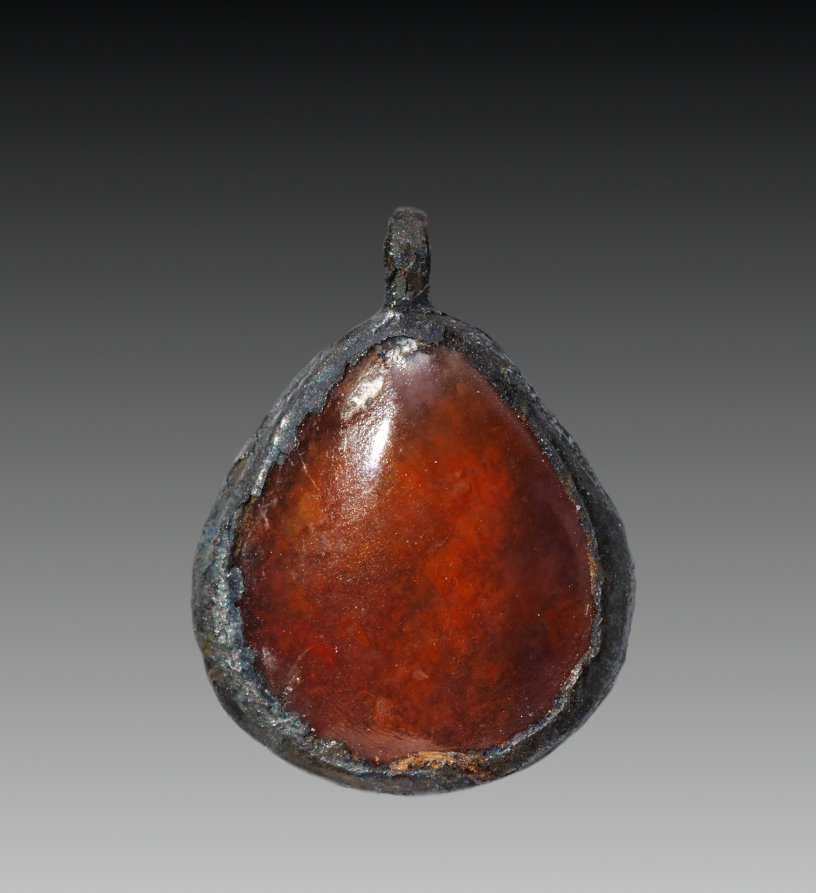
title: Oyster-Shell Pendant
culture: Egypt, Middle Kingdom (2040–1648 BCE), Dynasty 12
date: 1980–1801 BCE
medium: carnelian and silver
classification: Jewelry